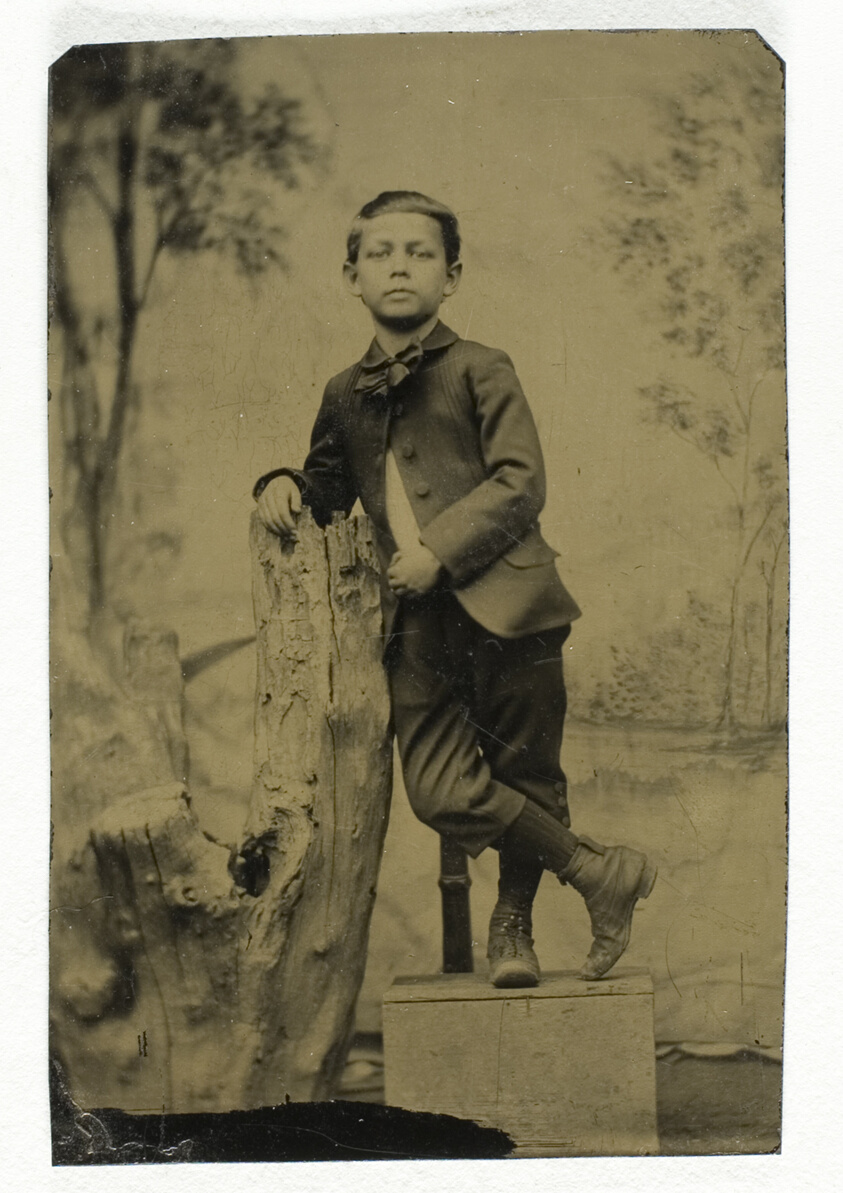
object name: Photograph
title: Untitled (Portrait of Boy Leaning)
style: 19th century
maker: Artist unknown; 19th century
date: 1850/99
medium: Tintype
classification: photography; photograph